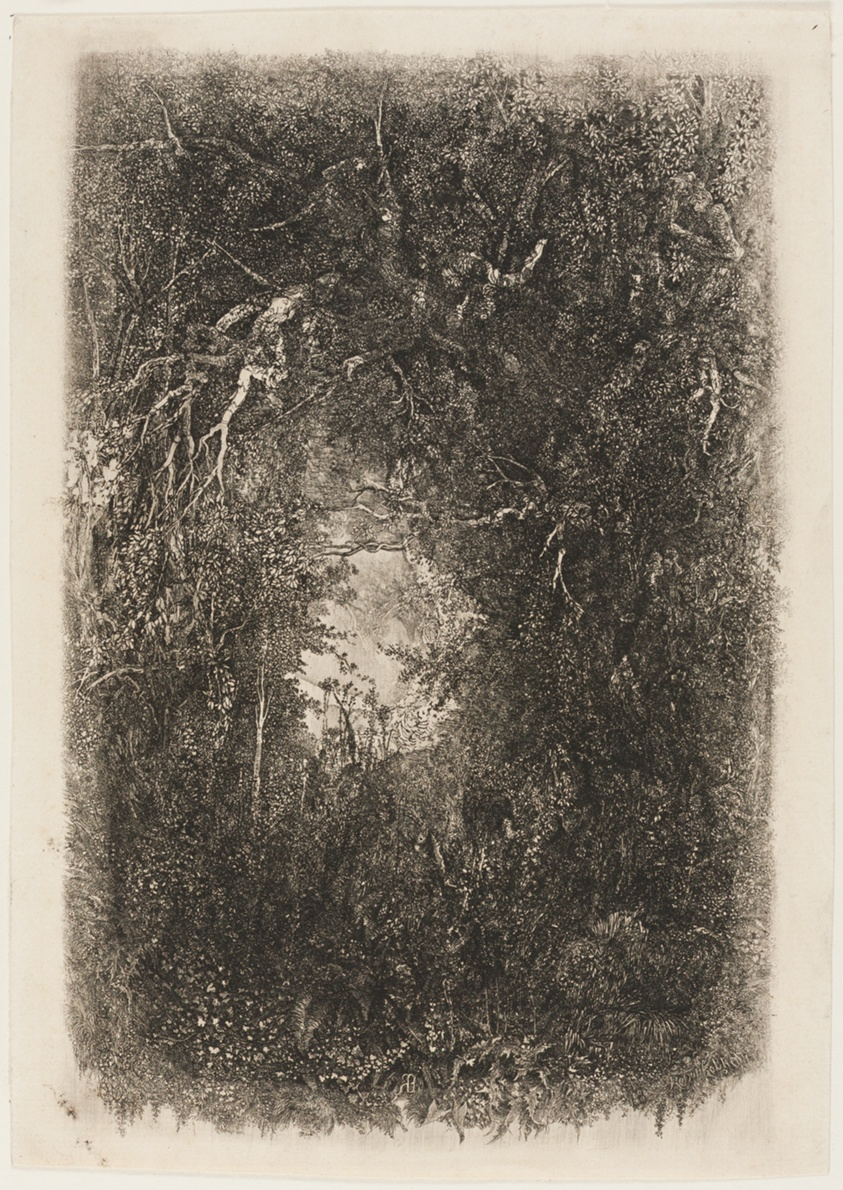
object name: Print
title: Clearing in the Forest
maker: Rodolphe Bresdin (French, 1825-1885)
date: 1880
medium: Etching on cream laid paper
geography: France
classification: etching; print; prints and drawing